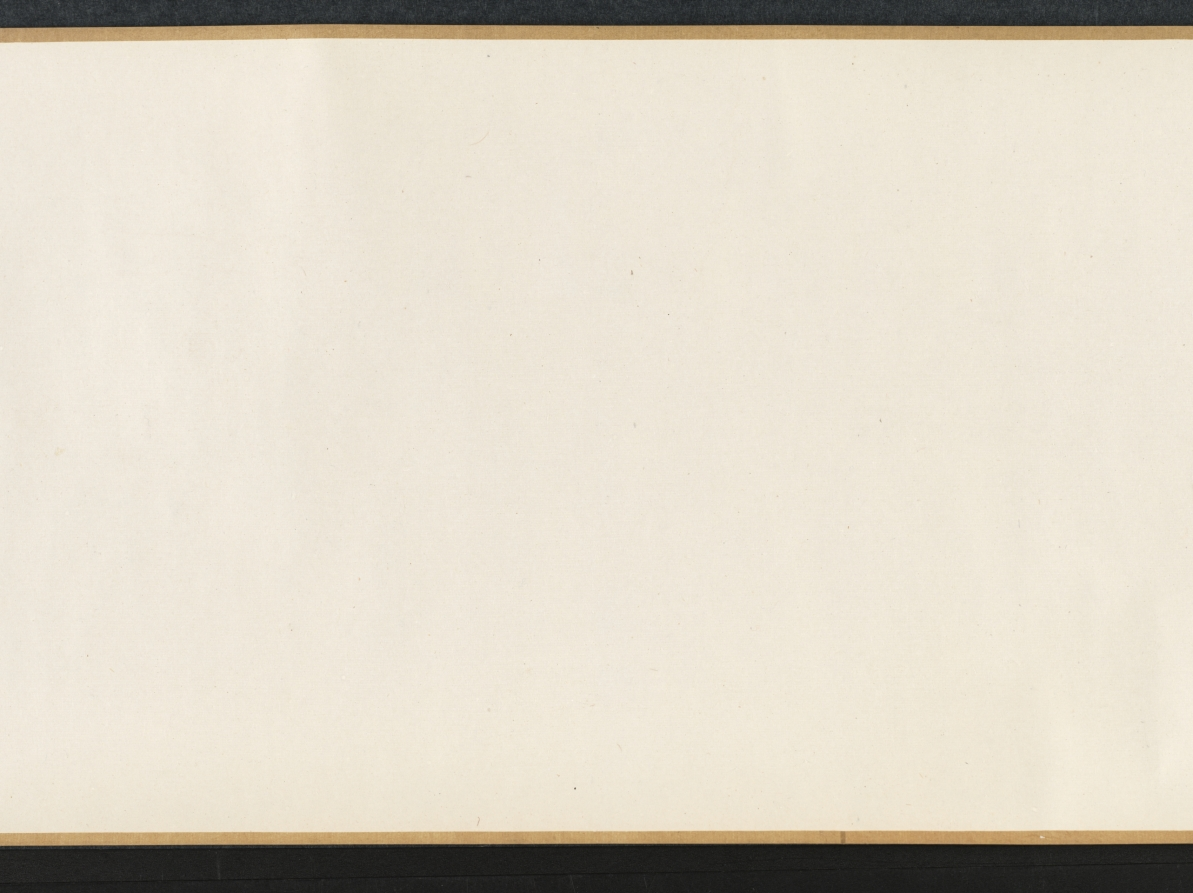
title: The Lantern Night Excursion of Zhong Kui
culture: China, Yuan dynasty (1271-1368)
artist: Yan Hui (Chinese, active 1270–1310)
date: late 1200s–early 1300s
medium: handscroll; ink and slight color on silk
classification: Painting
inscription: Artist's signature [and probable seal]: Yan Qiuyue 顏秋月 Title on frontispiece and 1 seal of Niu Shuyu 鈕樹玉 (1760–1827): Qiuyue mohuan 秋月墨幻 [Qiuyue's Ink Fantasy]. 31 additional seals: 2 of Yang Shiqi 楊士奇 (1365–1444); 2 of An Guo 安國 (1481–1534); 8 of Xiang Yuanbian 項元汴 (1525–1590); 2 of Geng Zhaozhong 耿昭忠 (1640–1686); 4 of Pu Tung 溥侗 (1870–1952); 7 of Tan Jing 譚敬 (1911–1991); 1 of Liu Ting-chih (20th c.); 5 unidentified.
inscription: An inscription by Zizhi Shanren 紫芝山人 [probably Jiang Hui 蔣惠], dated 1389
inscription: An inscription by Wu Kuan 吳寬 (1436–1504)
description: Here, the demon queller Zhong Kui leads a nightly procession of street entertainers with bare, muscular bodies and demonic faces. Some wear shabby clothes, and all perform stunts and tricks to astound and scare the viewer. In fact, a New Year custom in cities of southeast China had the poor, disguised as demons, process through the streets and play their tricks to clear households of evil spirits and welcome the spring. From right to left, a demonic figure leads the procession and beats a drum; another lifts a large rock; one stands on his hands trying to drink; one balances a jar on his elbow; three hold and wield weapons; one carries a folded chair covered by a cow’s skin; another holds Zhong Kui’s qin (zither), books, brush, and inkstone. At the end of the scroll, two figures offer a cup and bottle of wine to Zhong Kui, who lifts his hand in command.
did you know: Zhong Kui was an ancient ghostbuster.